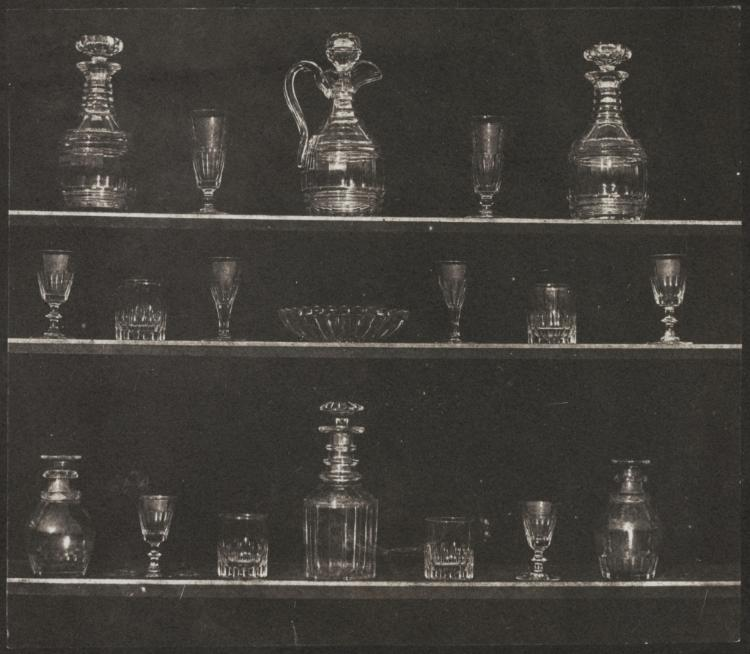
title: Articles of Glass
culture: England, 19th century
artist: William Henry Fox Talbot (British, 1800–1877)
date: 1844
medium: salted paper print from calotype negative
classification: Photograph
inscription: Written in black ink on verso: "LA 4"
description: Pursuing such diverse interests as language, mathematics, botany, and optics, William Henry Fox Talbot was a prominent scholar and scientist. In 1839 he invented the first system of positive and negative photography—the calotype process. The basis of all modern photography, the calotype's paper negative made possible the infinite reproduction of prints from a single negative. In Articles of Glass, three rows of sparkling glass objects are isolated against a dark background, illustrating the new medium's ability to capture the nuances of light and record reality. A remarkable technical and aesthetic achievement, the image testifies to Talbot's artistry and classical sensibilities, expressed through his use of symmetry and a central focus. This image was included in Talbot's The Pencil of Nature (1844), one of the first books illustrated with actual photographic prints.